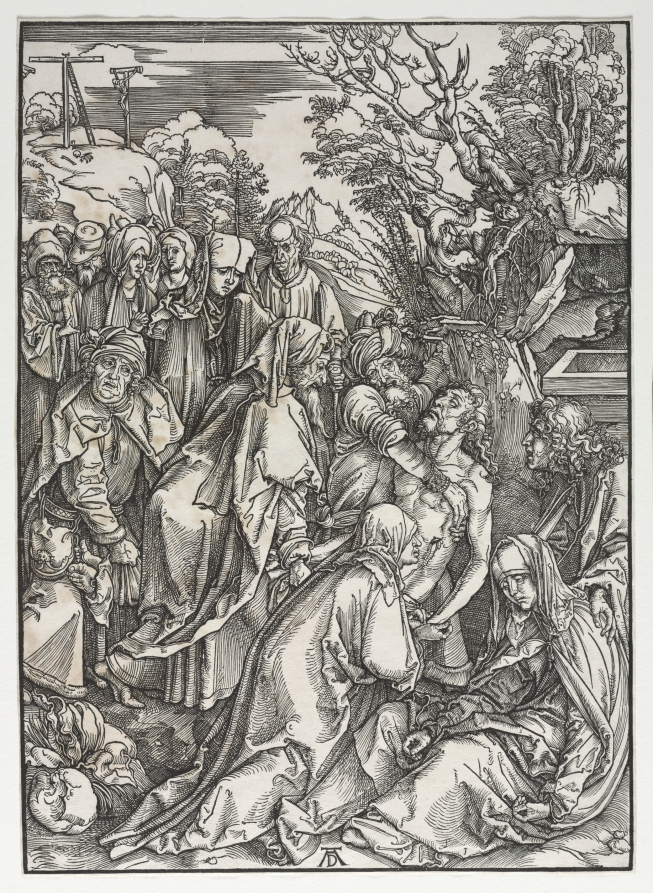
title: The Great Passion: The Deposition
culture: Germany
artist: Albrecht Dürer (German, 1471–1528)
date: c. 1497–1510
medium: woodcut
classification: Print